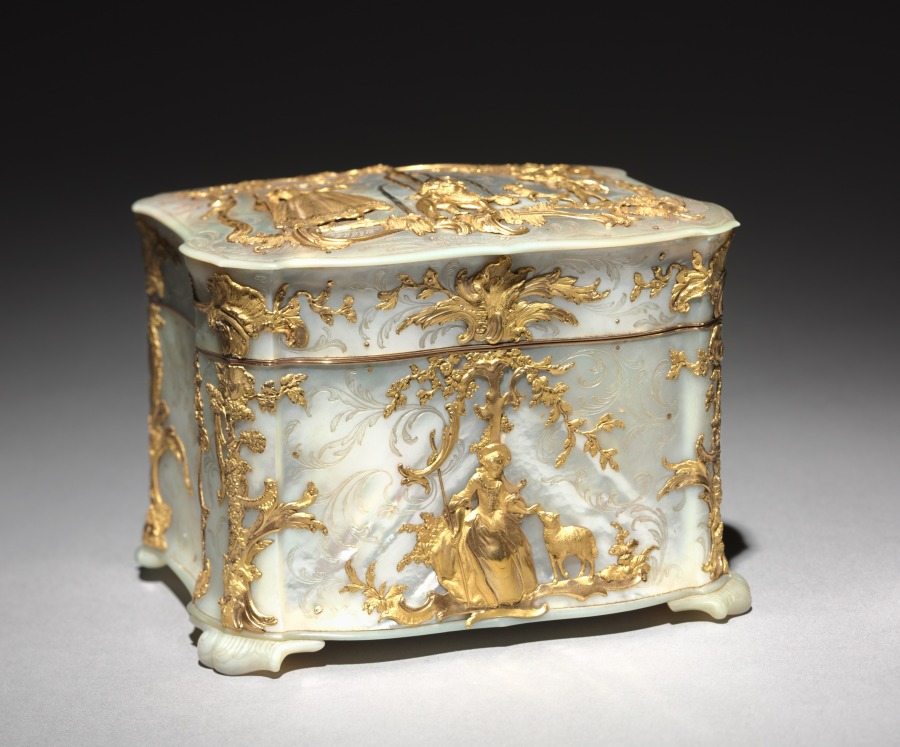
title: Sewing Box with Implements (Nécessaire)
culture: Austria, possibly Vienna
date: c. 1765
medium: gold and mother-of-pearl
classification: Miscellaneous